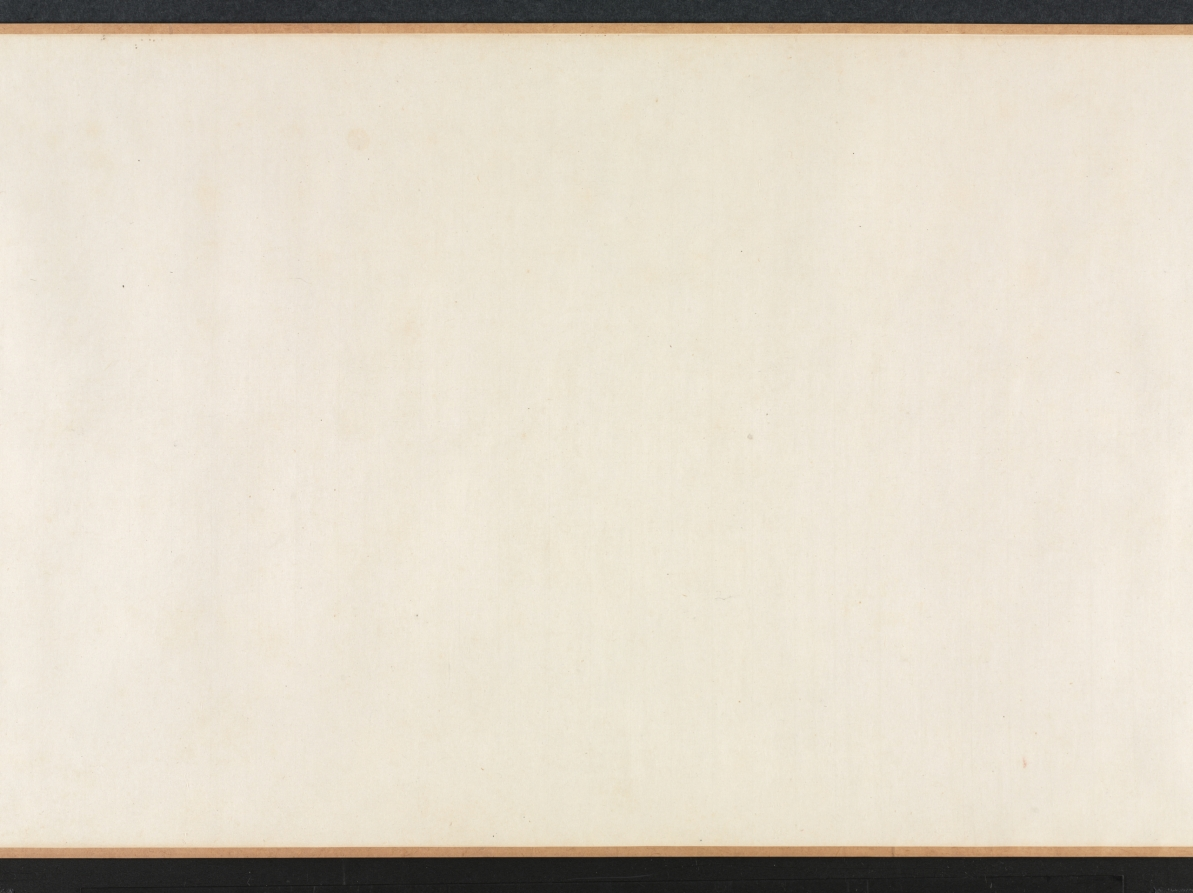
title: Hall of Lofty Pines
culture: China, Qing dynasty (1644-1911)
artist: Wang Hui (Chinese, 1632–1717)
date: 1703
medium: handscroll; ink and color on paper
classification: Painting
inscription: [題] 松喬堂圖 康熙癸未夏六月, 海虞耕煙散人王翬畫。[印]王翬之印; 石谷. [左下] 來青閣; 耕煙野老時年七十有二.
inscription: 松喬堂圖一卷，海虞石谷王君為靜海近公厲少司冦公作也。圖成于癸未之夏。未幾而公遂仙去。公令子今編修君南湖屬余題跋其後。余與公同官侍從，交契最深。側見公之清修純德，蔚為聖天子所眷重。侍直內廷，密勿贊襄，幾二十餘年。蒼生之所以受賜，士林之所以沐德者，天下莫能窺，在廷莫能悉。而公卒不言。以故宸衷日益契，恩禮亦日益渥。雖年逾懸車，時有歸老之念。而上固不聼公之去。其所謂松喬堂者，御書以賜公者也。蓋以松比公之清風勁節，而歲寒不改，經霜彌茂。則又以期公之壽考未有艾焉。公知此身未易乞，而山林槃磵之樂，止可寄諸寤思。此松喬堂圖之所由作也歟。石谷此圖，結構精密，筆墨超邁。其寫樹木之蒼蔚，堂宇之靚幽。恍見摩詰輞川樂天廬山之勝。獨惜公未得一日徜徉故園以償其願。即繪於圖亦未得以永其趣，此編修君之所以眷眷不忘也。雖然千歳之松喬，下蔭百畝，上以修棟梁之需。然則上當日名堂之意，不更望於後之人襲其芘而養其材也哉。吾願編修君之寶斯圖。并望君之塗塈丹雘，大其堂構也已矣。 康熈丙戍重陽三日，雲間王鴻緒跋。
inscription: 10 additional seals: 1 seal of Li Duna 勵杜納 (1628–1703); 4 seals of Zha Ying 查瑩 (jinshi of 1766); 5 seals of Li Yun (dates unknown).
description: Wang Hui 王翬, a leading painter in the orthodox school of the early Qing dynasty (1644–1911), was commissioned to paint this landscape with a country estate for Li Duna 勵杜納 (1628–1703), vice minister of justice in Emperor Kangxi’s court. The emperor had honored Li by granting him a piece of calligraphy with the name of Li’s retirement retreat, “Hall of Lofty Pines.” He drew a comparison between pines and Li’s upright character, resilience, and longevity. Wang Hui’s painting was supposed to allow Li to imagine living in a beautiful, secluded compound among the hills and pines. Sadly, Li died before seeing the completed painting and before receiving the emperor’s permission to retire. The landscape begins with peaceful riverbanks and low hills. The pines around the estate in the middle of the handscroll are truly lofty, some stretching even beyond the frame of the painting. Li Duna, the estate’s owner, is shown twice in his serene mountain retreat: first approaching the entrance to the compound with two servants at the right, and then later in the scroll, to the left, reading in the comfort of an inner room.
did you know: One servant carries the estate owner's carefully wrapped qin, a type of zither.